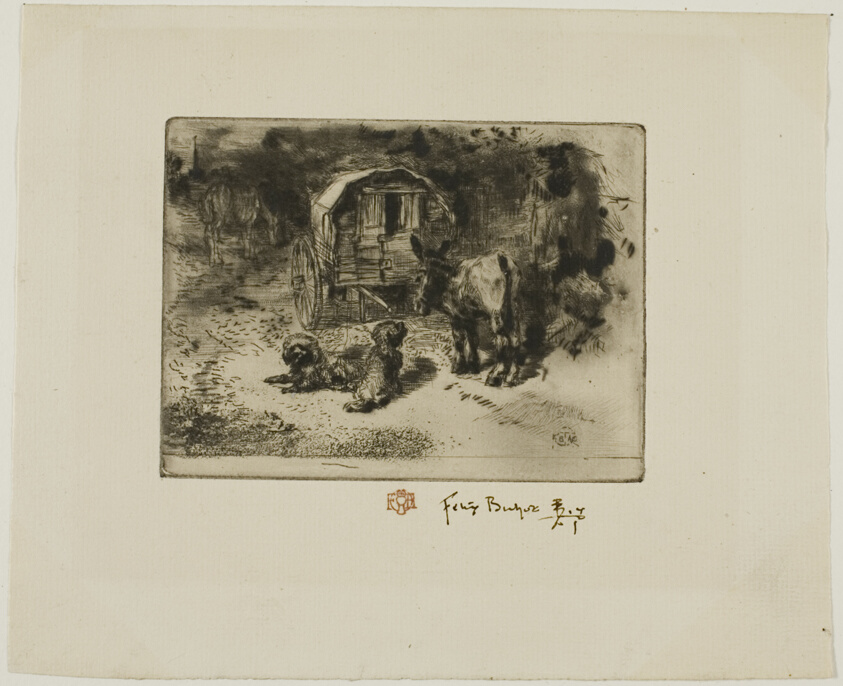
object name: Print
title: The Guardians of the House, or the Acrobat's Companions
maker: Félix Hilaire Buhot (French, 1847-1898)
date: c. 1877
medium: Drypoint and roulette on ivory laid paper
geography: France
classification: drypoint; print; prints and drawing